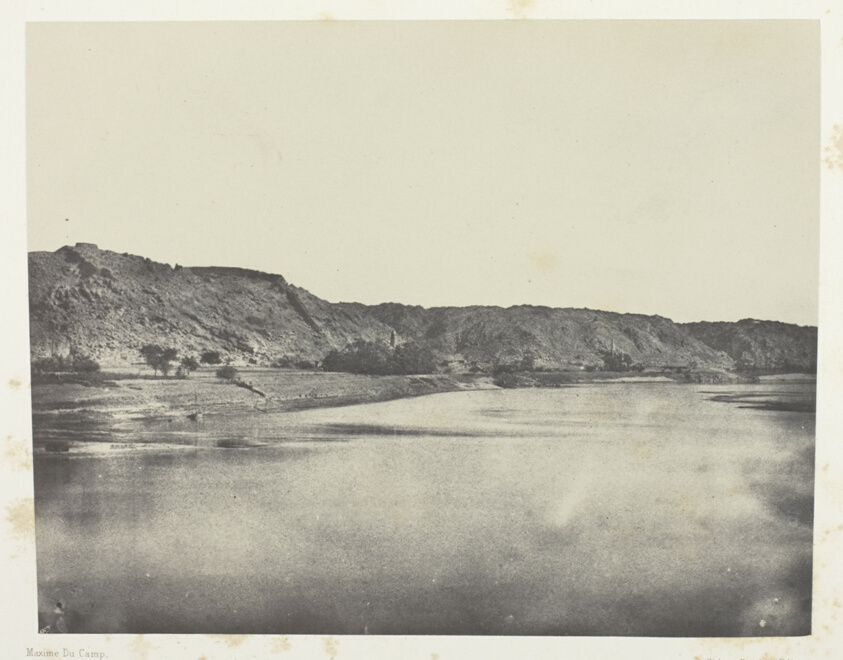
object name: Photograph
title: Rive Orientale du Nil (Village de Bab), Vue Prise au Sud Philoe; Nubie, plate 82 from the album "Egypte, Nubie, Palestine et Syrie" (1852)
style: 19th century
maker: Maxime Du Camp (French, 1822–1894)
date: 1849/51, printed 1852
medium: Salted paper print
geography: France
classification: salted paper print; photographic process; photography; photograph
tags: Collected by Hugh Edwards, Egypte, Nubie, Palestine et Syrie